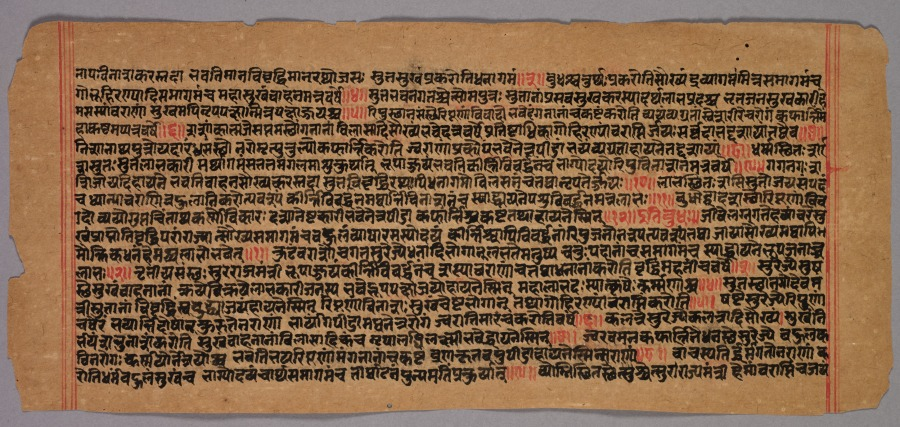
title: Page from a Jaina Manuscript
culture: India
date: 1400s–1500s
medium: ink on paper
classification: Manuscript